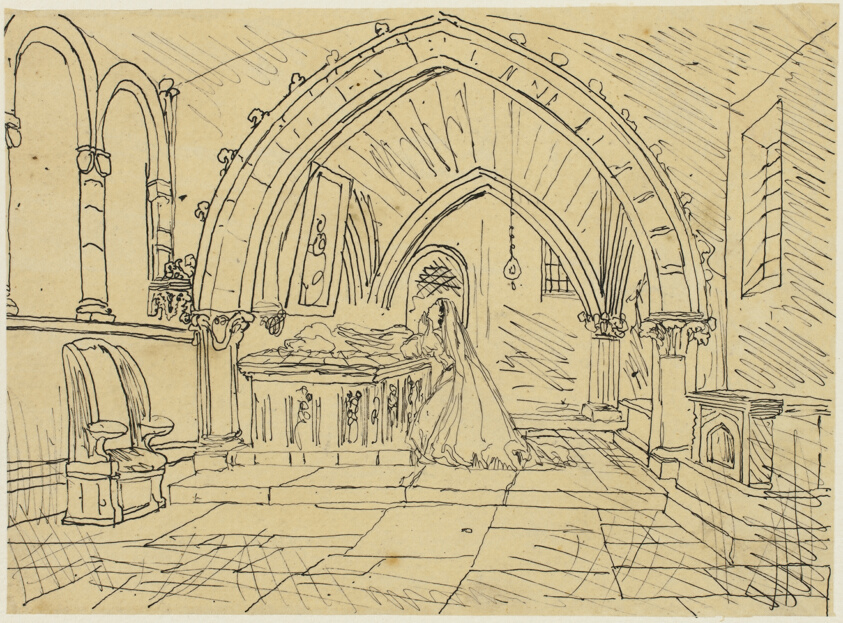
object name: Drawing and Watercolor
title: Prayer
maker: Rodolphe Bresdin (French, 1825-1885)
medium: Pen and black ink, on tan tracing paper, laid down on ivory wove paper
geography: France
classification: pen and ink drawings; drawings (visual works); prints and drawing